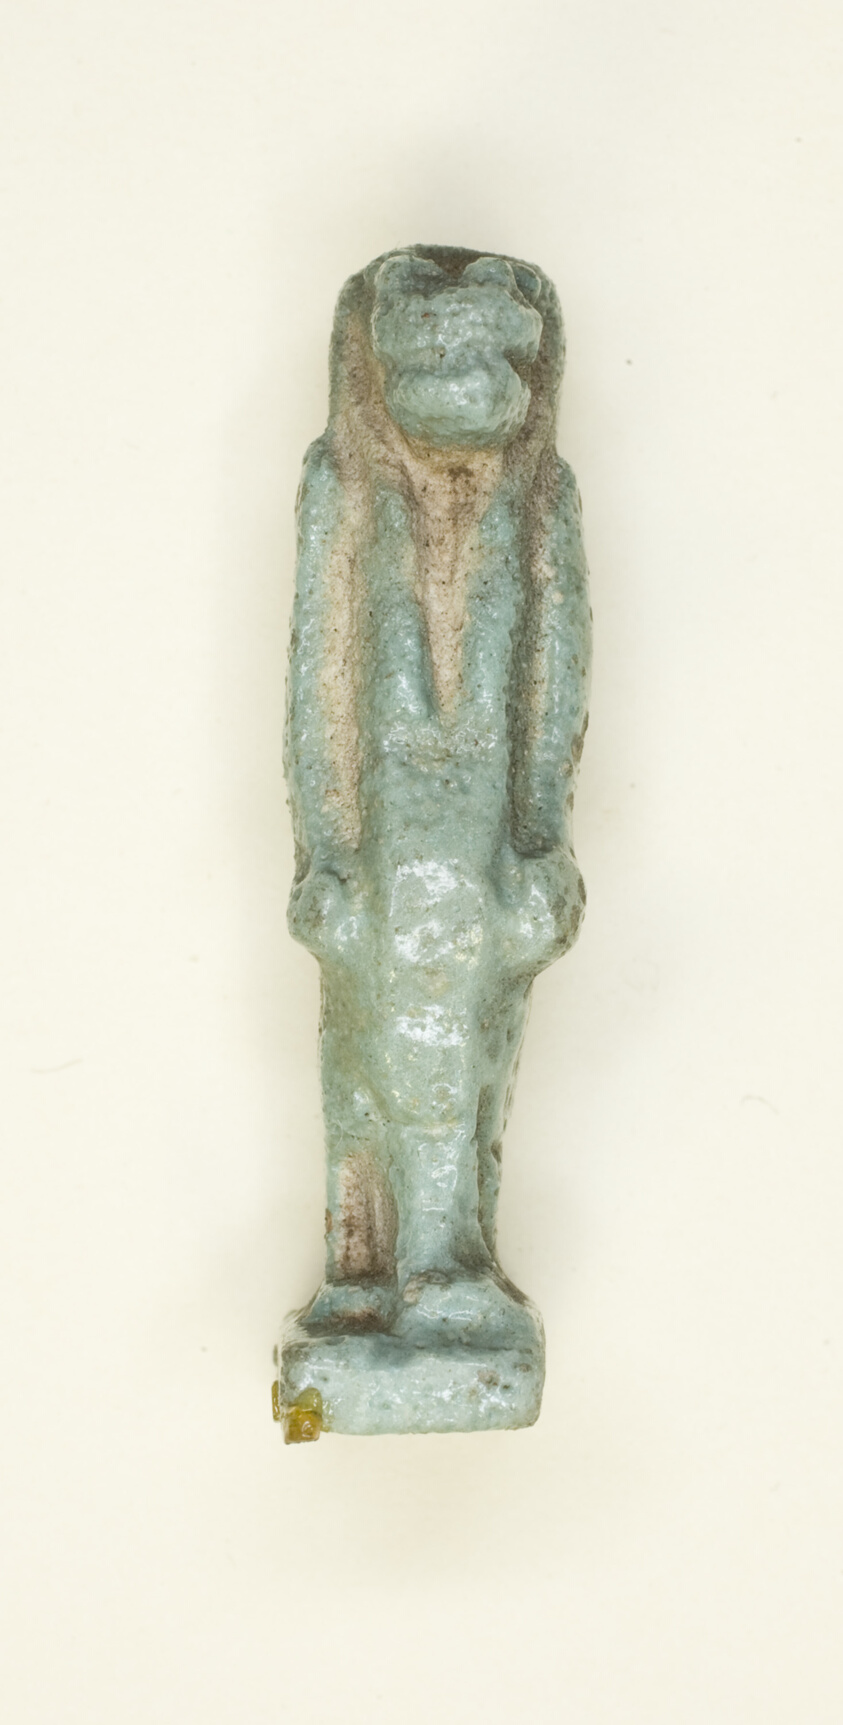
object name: Costume and Accessories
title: Amulet of the Goddess Taweret (Thoeris)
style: egyptian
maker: Egyptian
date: Third Intermediate Period–Late Period, Dynasties 21–31 (about 1069–332 BCE)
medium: Faience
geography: Egypt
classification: amulet; jewelry; ceramics; ancient art; costume; faïence (composite material)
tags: goddesses